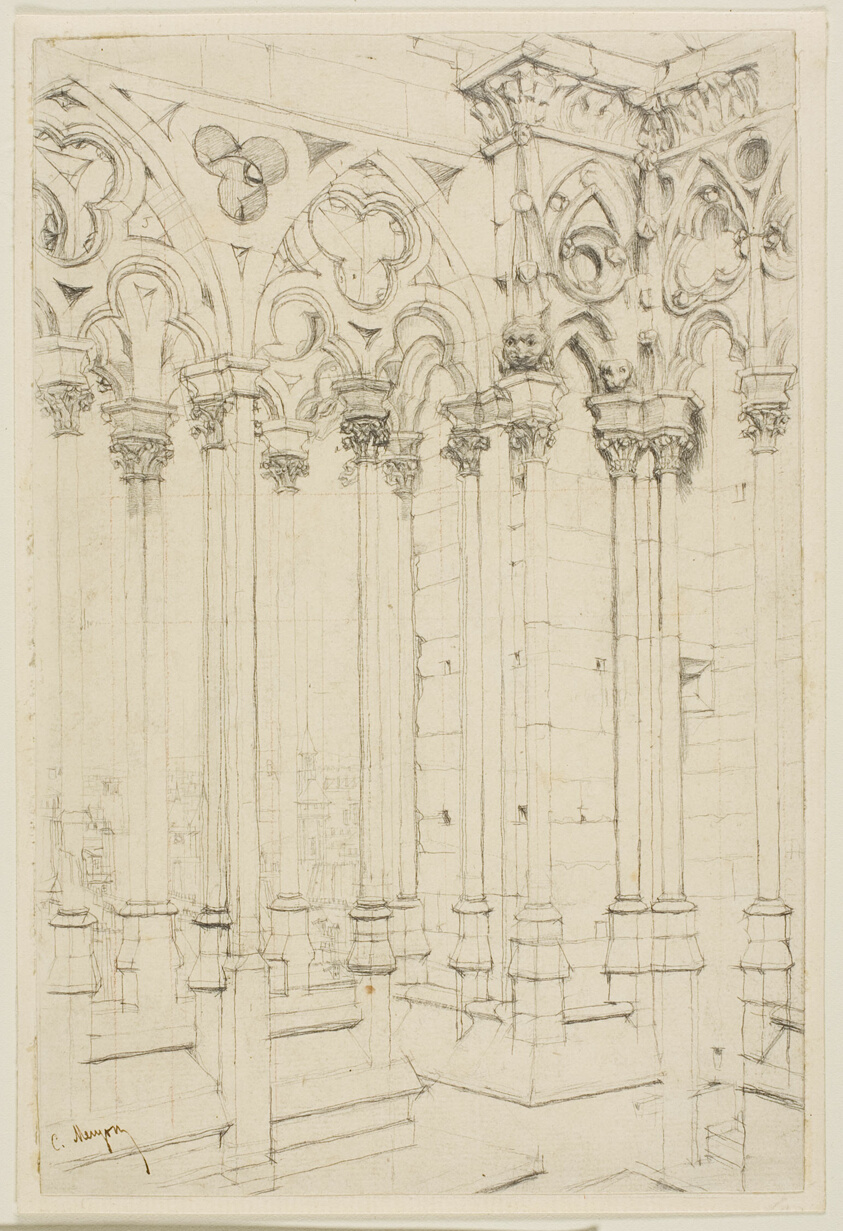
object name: Drawing and Watercolor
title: The Gallery of Notre-Dame, Paris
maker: Charles Meryon (French, 1821-1868)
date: 1853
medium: Graphite, squared in red Conté crayon, on ivory laid paper edge-mounted to cream laid card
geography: Paris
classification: graphite; drawings (visual works); prints and drawing